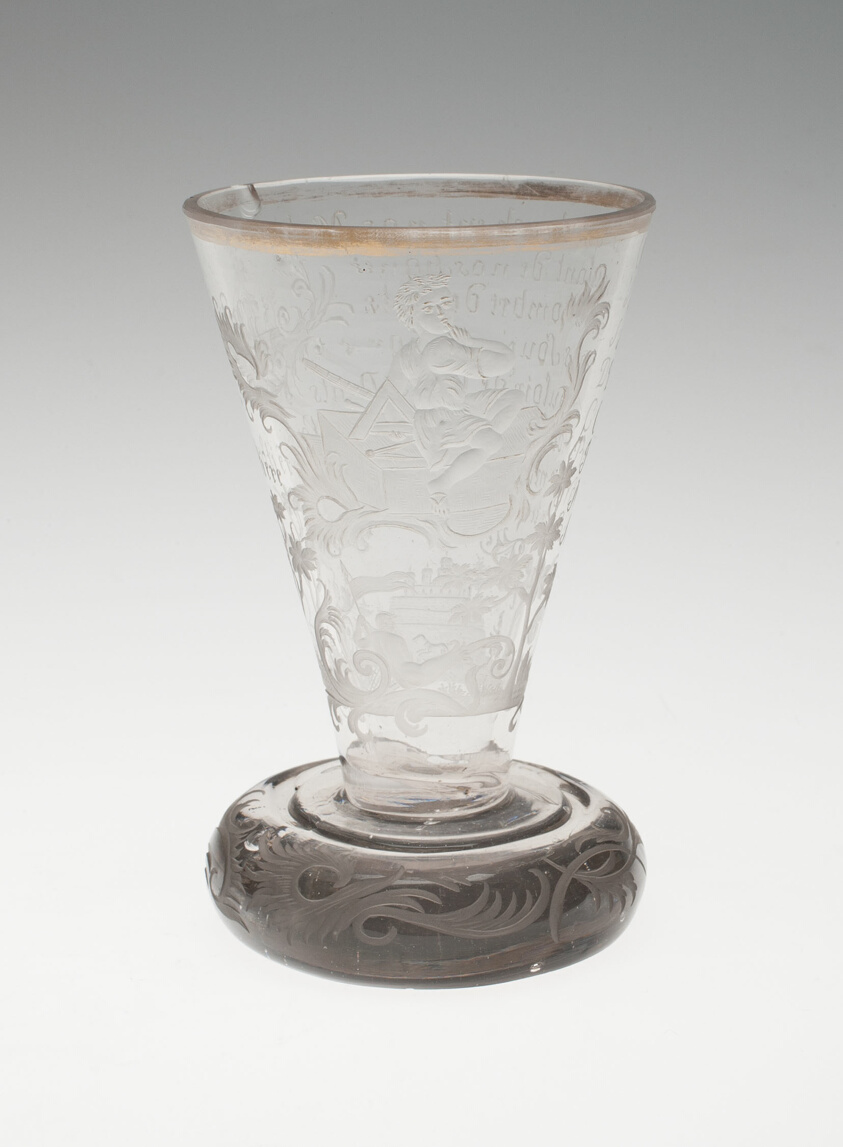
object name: Glass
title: Bowl of Wine Glass with Silver Foot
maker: Bohemia, Czech Republic and Germany, Schleswig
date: c. 1740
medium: Glass; engraved and silver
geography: Bohemia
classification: drinking vessel; glass; european decorative arts